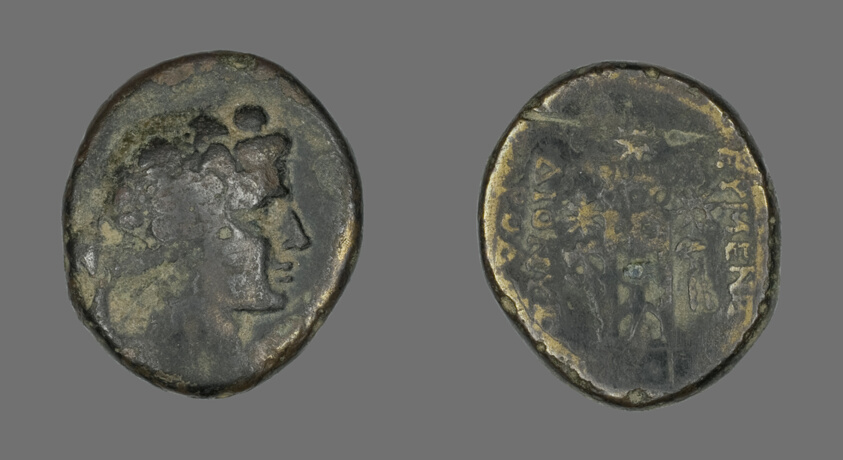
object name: Coin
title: Coin Depicting the God Dionysos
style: greek, ancient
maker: Greek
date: about 133 BCE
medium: Bronze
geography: Ancient Greece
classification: coin; ancient art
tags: gods (deities)